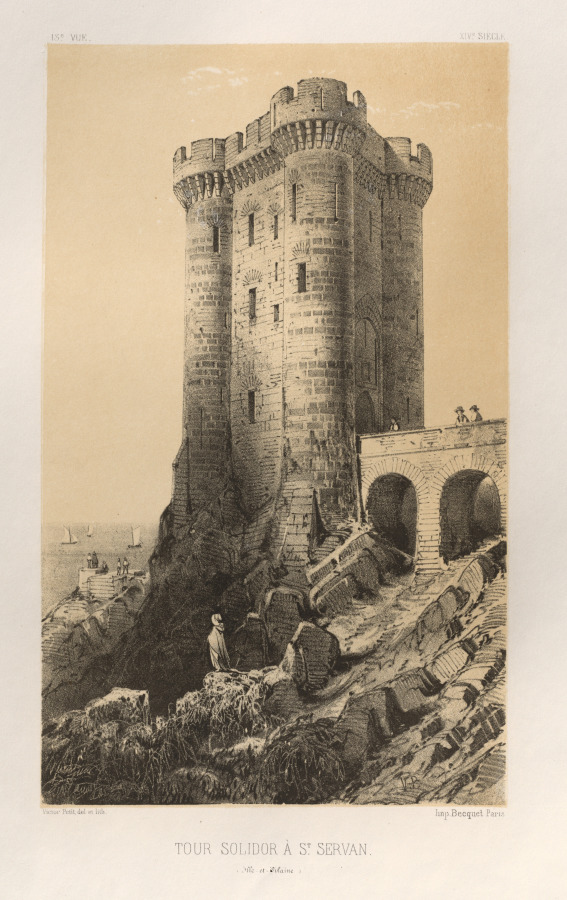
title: Architecture Pittoresque ou Monuments des xveme. Et xvieme. Siecles: Chateaux De France des XV et XVI Siecles: Pl.13, Tour Solidor a St. Servan (Ille-et-Vilaine)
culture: France, 19th century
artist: Victor Petit (French, 1817–1874)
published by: Charles Boivin (publisher and editor); Lith de Godard a Paris (printer)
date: 1860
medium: lithograph with tint stone, from portfolio of 100 lithographs with tint stone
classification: Print